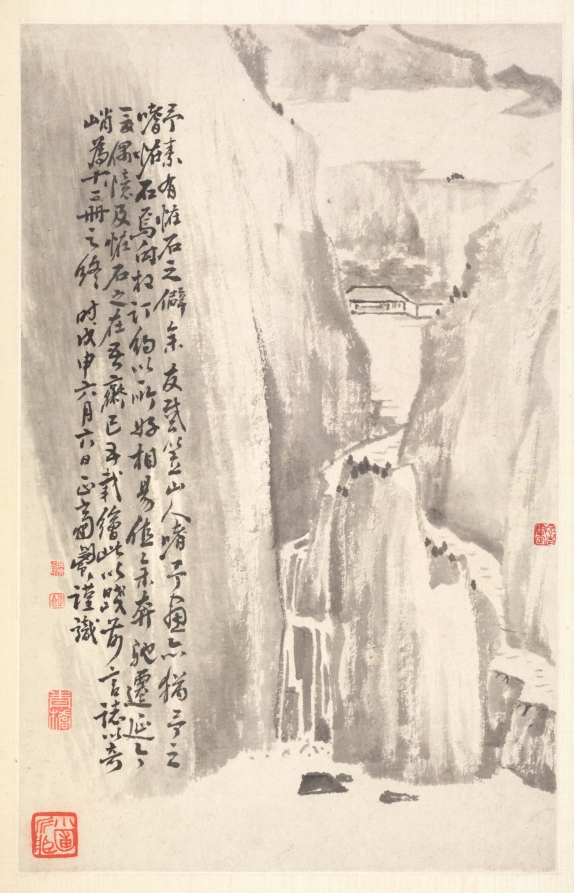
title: Sheer Cliffs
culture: China, Qing dynasty (1644-1911)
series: Album of Miscellaneous Subjects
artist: Min Zhen (Chinese, 1730–after 1788)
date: 1788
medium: album leaf, ink on paper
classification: Painting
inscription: 予素有怪石之僻。余友戴笠山人嗜予畫，亦猶予之嗜怪石焉。向故訂約，以所好相易。值余奔馳遷延，今夏偶憶及怪石之在吾齋已五載。繪此以踐前言。誌以奇峭為十二冊之終。時戊申六月六日，正齋閔貞謹識。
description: Min Zhen, who was orphaned at age 12 and developed an eccentric personality, was trained by Tang Yin (1682–1756), a writer, playwright, and superintendent of the imperial porcelain workshops in Jingdezhen. The connection to him may have enabled Min to stay in Beijing for a decade from around 1773. It is not clear whether he ever resided in Yangzhou, but his style is in many instances reminiscent of that of Yangzhou artist Huang Shen. This album demonstrates Min’s versatility and mature style in the last years of his life.